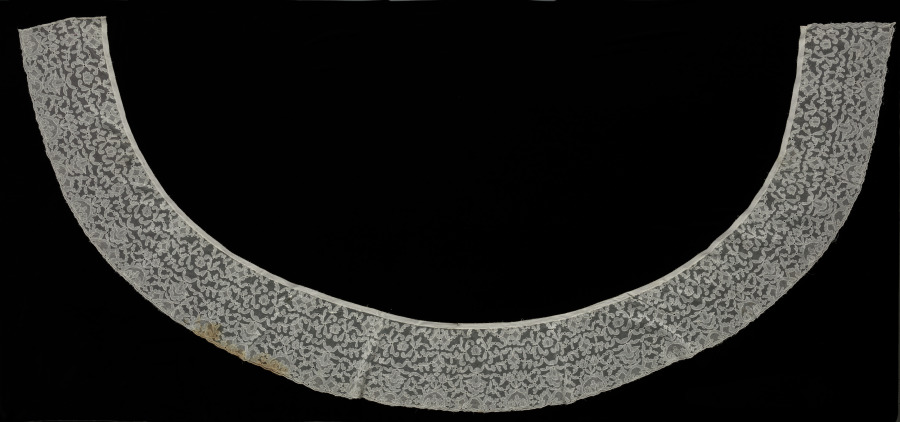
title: Lace Flounce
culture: Spain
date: 1800s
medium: Machine-made lace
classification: Lace